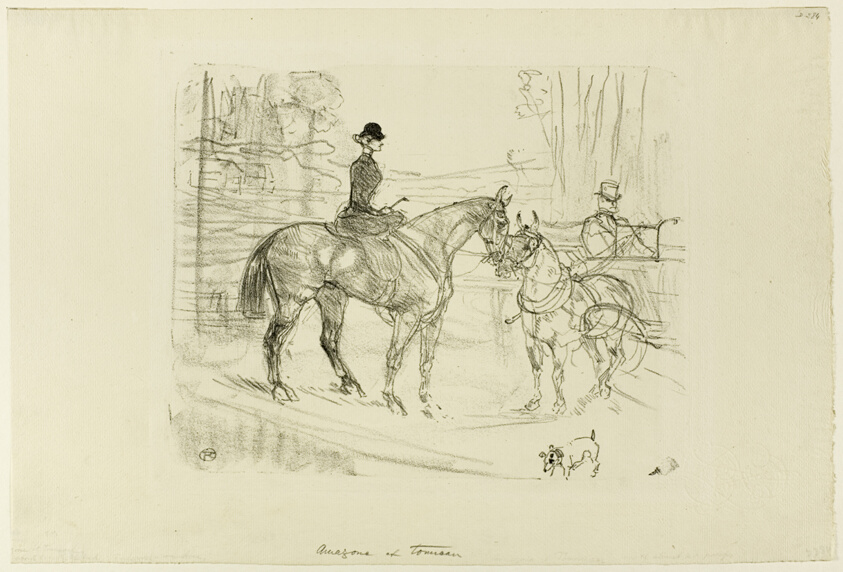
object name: Print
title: Horsewoman and Cart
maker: Henri de Toulouse-Lautrec (French, 1864-1901)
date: 1899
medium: Lithograph on cream laid paper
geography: France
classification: lithograph; print; prints and drawing